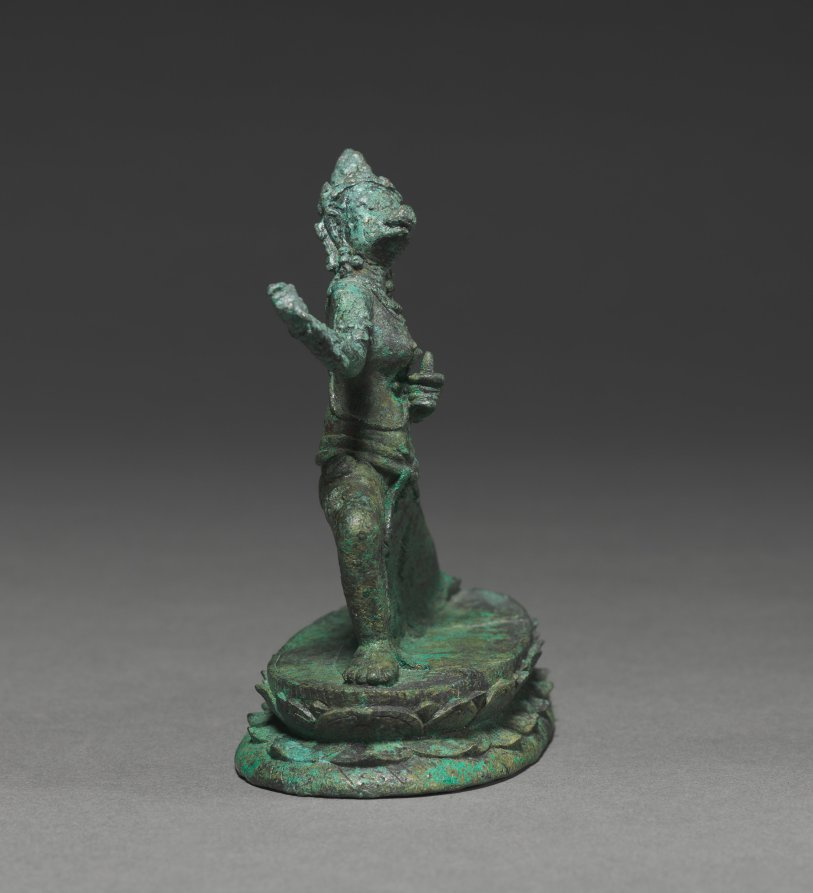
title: Varahi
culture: Java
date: 800s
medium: bronze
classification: Sculpture